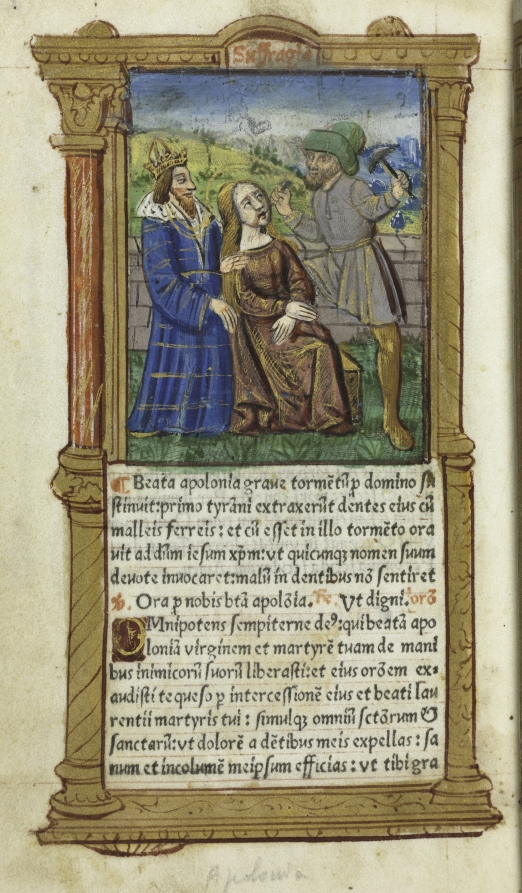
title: Printed Book of Hours (Use of Rome): fol. 111v, St. Apollonia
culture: France, Paris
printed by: Guillaume Le Rouge (French, Paris, active 1493–1517)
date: 1510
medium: 112 Printed folios on parchment, bound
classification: Bound Volume